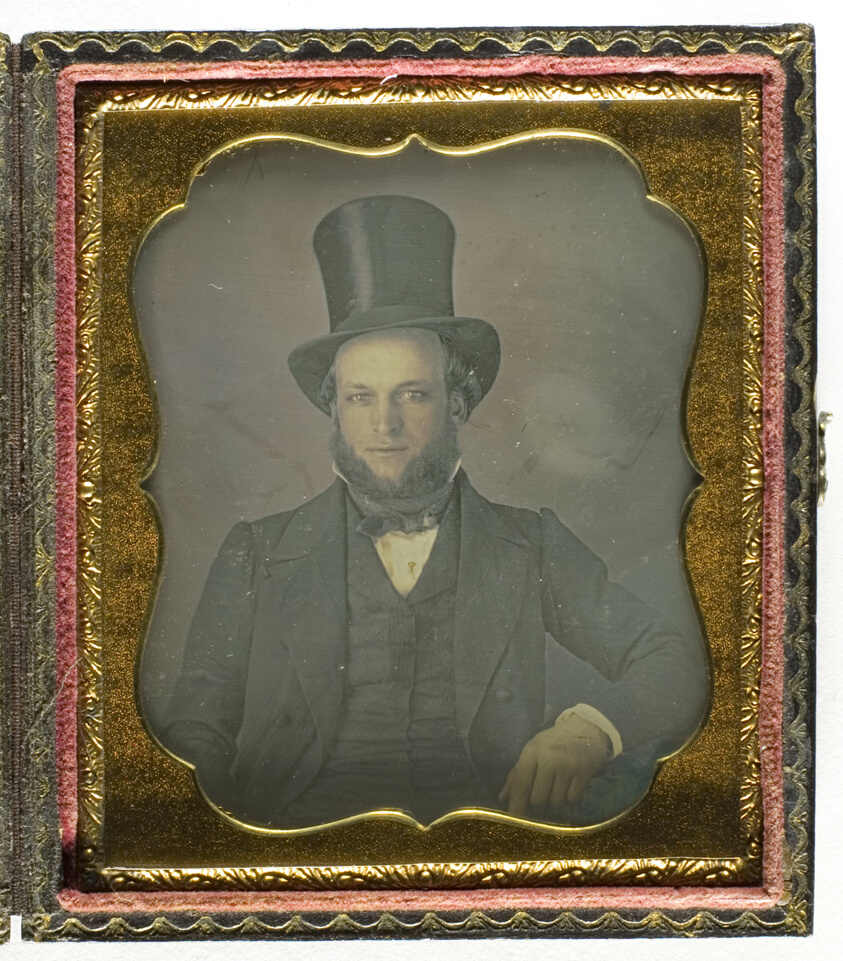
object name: Photograph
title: Untitled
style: 19th century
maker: Artist unknown; American, 19th century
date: 1839/60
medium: Daguerreotype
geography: United States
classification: daguerreotype; photographic process; photography; photograph